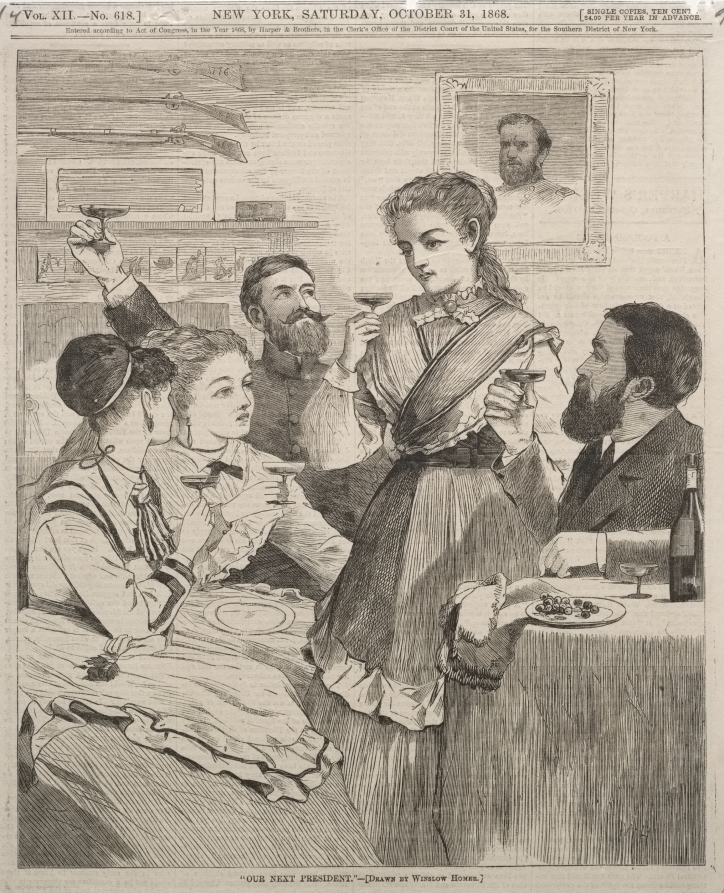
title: "Our Next President"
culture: America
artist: Winslow Homer (American, 1836–1910)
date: 1868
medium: wood engraving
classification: Print